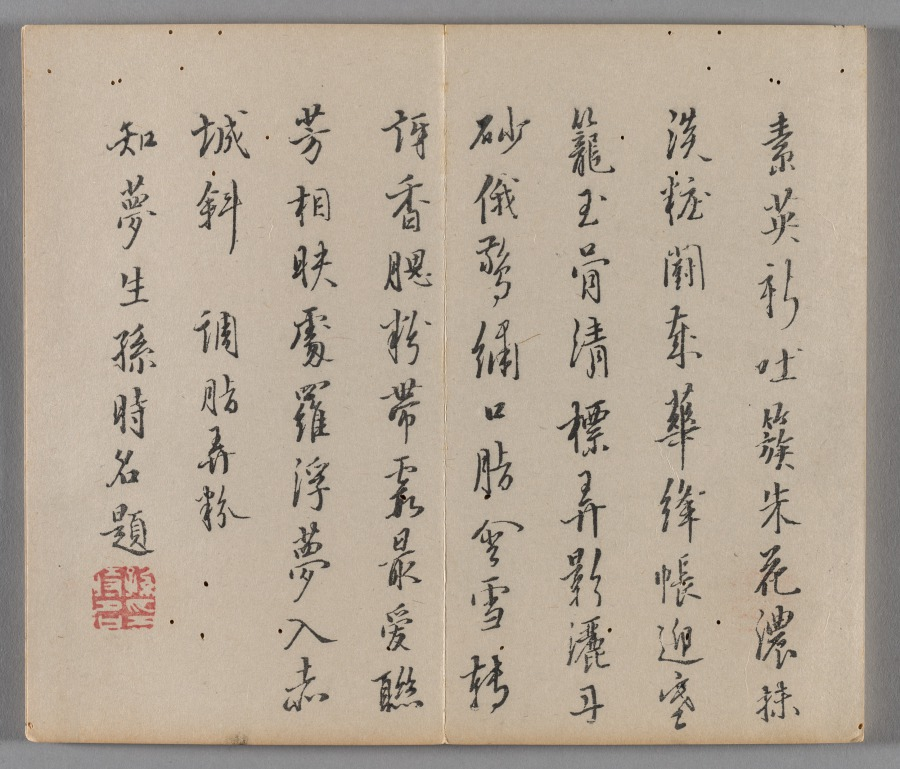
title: Ten Bamboo Studio Painting and Calligraphy Handbook (Shizhuzhai shuhua pu): Plum Blossoms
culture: China, Qing dynasty (1644-1911)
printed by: Hu Zhengyan (Chinese, c. 1584–1674)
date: 1633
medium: Woodblock-printed book; ink and colors on paper; first edition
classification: Print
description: Color printing reached a level of perfection in the early 1600s, as seen in this Ten Bamboo Studio Collection of Calligraphy and Painting and the Mustard Seed Garden Manual of Painting (printed 1679 and 1701). The painterly quality, precision in registering (aligning) the woodblocks, and harmonious colors made them the most successful color print editions in Chinese history. Both editions were printed and compiled in Nanjing, spread nationwide, and had a great impact on the arts in Japan and Korea.